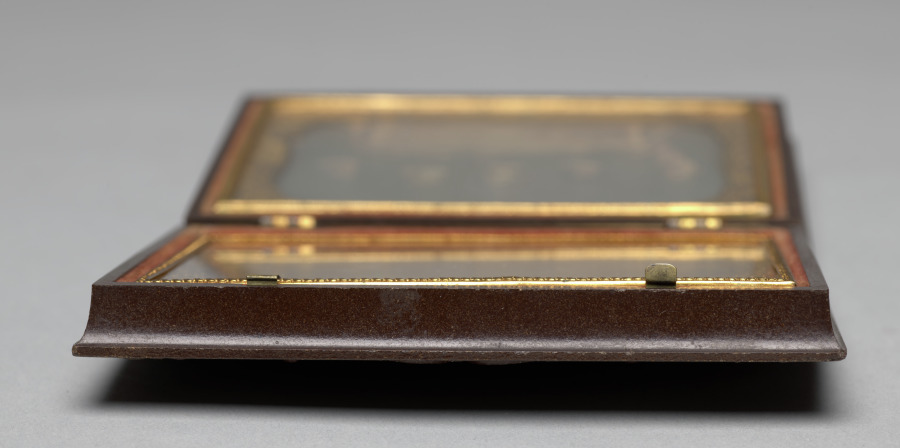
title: The Homework Table & Parents of Five Children Doing Homework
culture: America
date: c. 1858–60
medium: daguerreotype, quarter plate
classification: Photograph